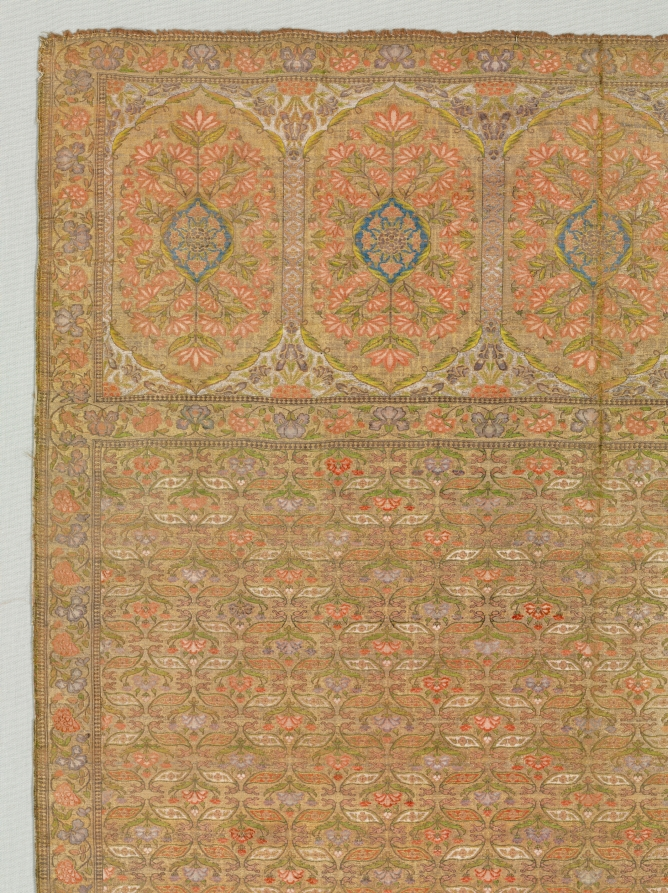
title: Sash with floral field and end panels on a gold ground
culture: Iran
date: 1700s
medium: taqueté with discontinuous wefts: silk, gilt- and silver-metal thread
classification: Textile